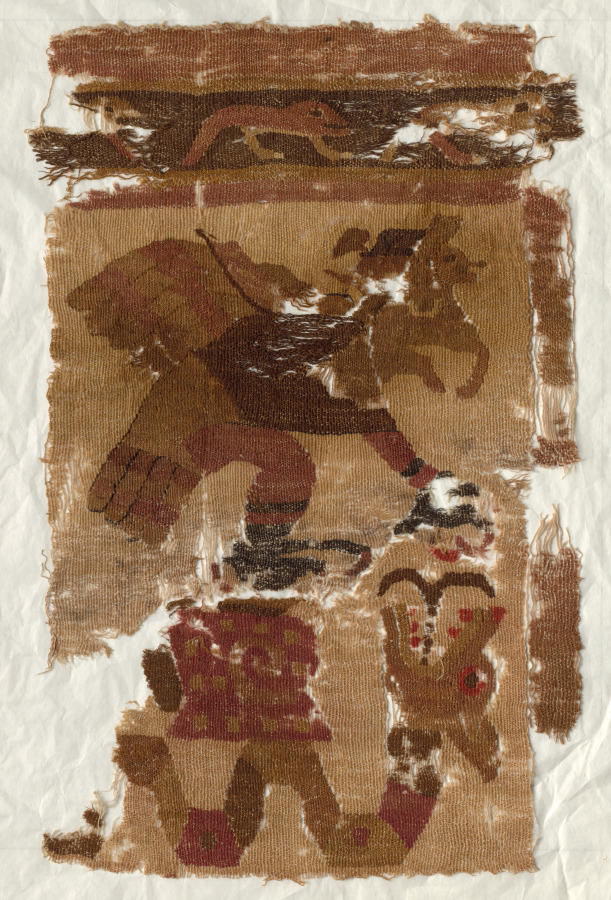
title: Textile Fragment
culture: Peru, Moche, north coast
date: c. 50–650 CE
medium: cotton and camelid fiber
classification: Textile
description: This fragment, one of several in the collection, is a rare survivor of catastrophic rains that destroyed much of the Moche textile legacy and may have helped to bring about the decline of Moche culture. It depicts a serpent and a snail beneath a hovering raptorial bird—perhaps a snail kite, a type of hawk named after its favored food. The size of the motifs implies that the original textile was large; a mantle (a shawl-like garment) or a hanging are among the possibilities.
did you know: This fragment is a rare survivor of floods that destroyed much of the Moche textile record.